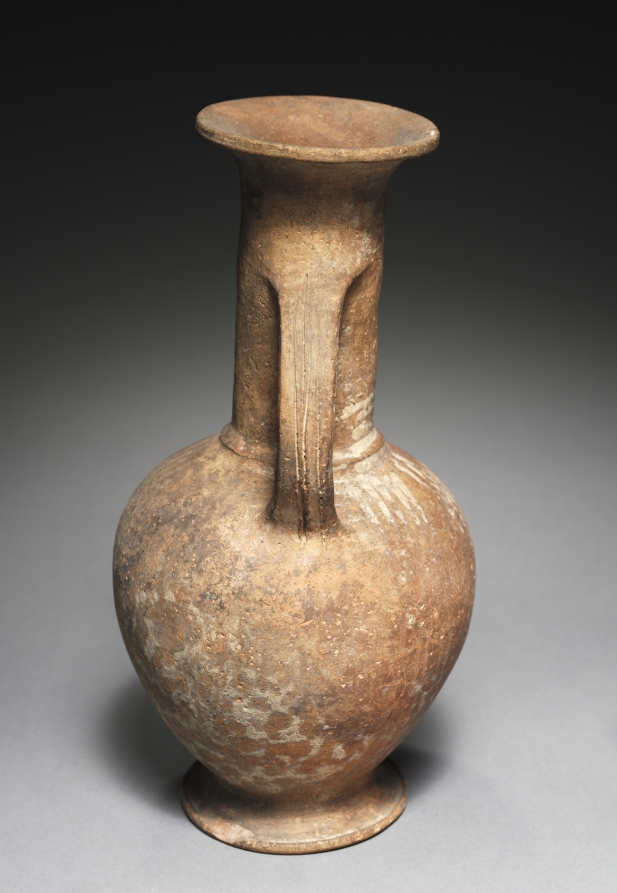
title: Jug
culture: Cyprus, late Cypriot II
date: c. 1450–1200 BCE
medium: base-ring ware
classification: Ceramic